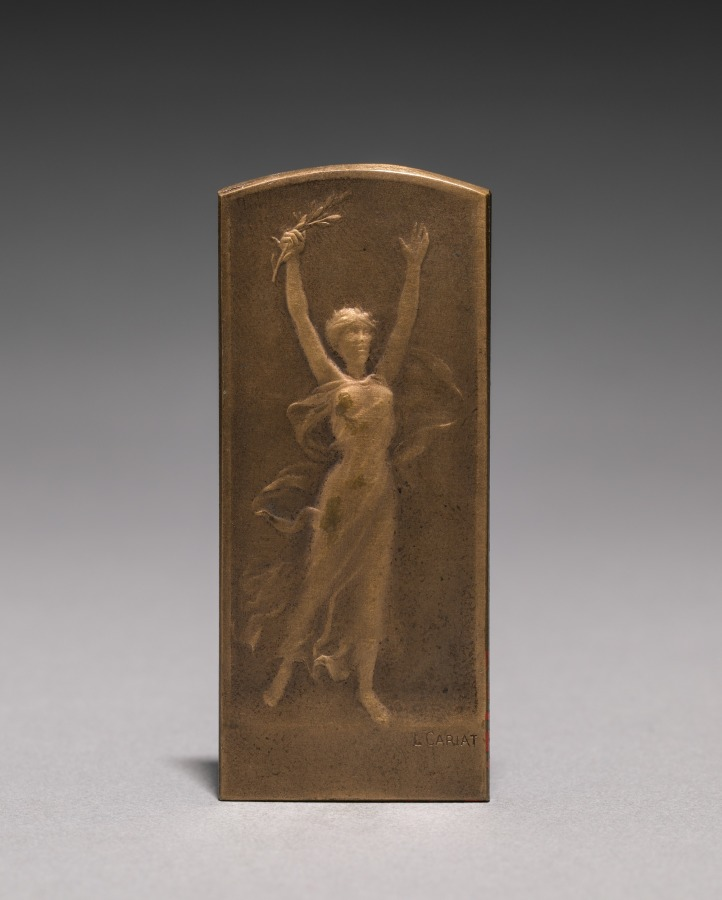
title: Medal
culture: France, 19th century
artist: Lucien Julien Henri Cariat (French)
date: c.1900–1925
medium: bronze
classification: Metalwork